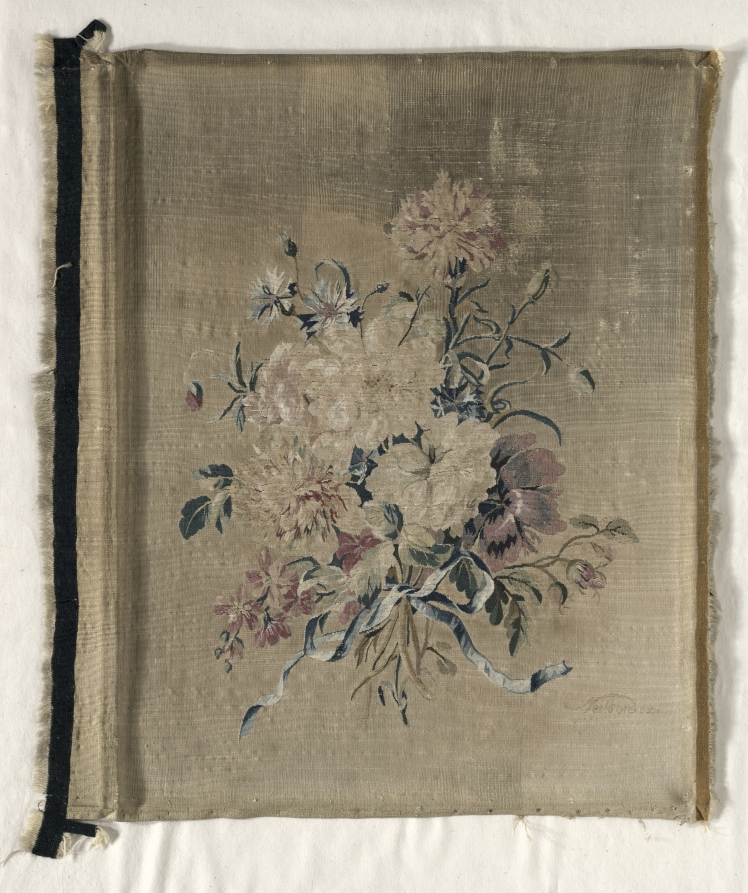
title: Tapestry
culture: France, 18th century (period of Louis XV)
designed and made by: Gobelins Manufactory (France, Paris, est. 1662)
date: c. 1760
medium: tapestry weave: silk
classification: Tapestry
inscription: signed lower right: "Neilson ex."